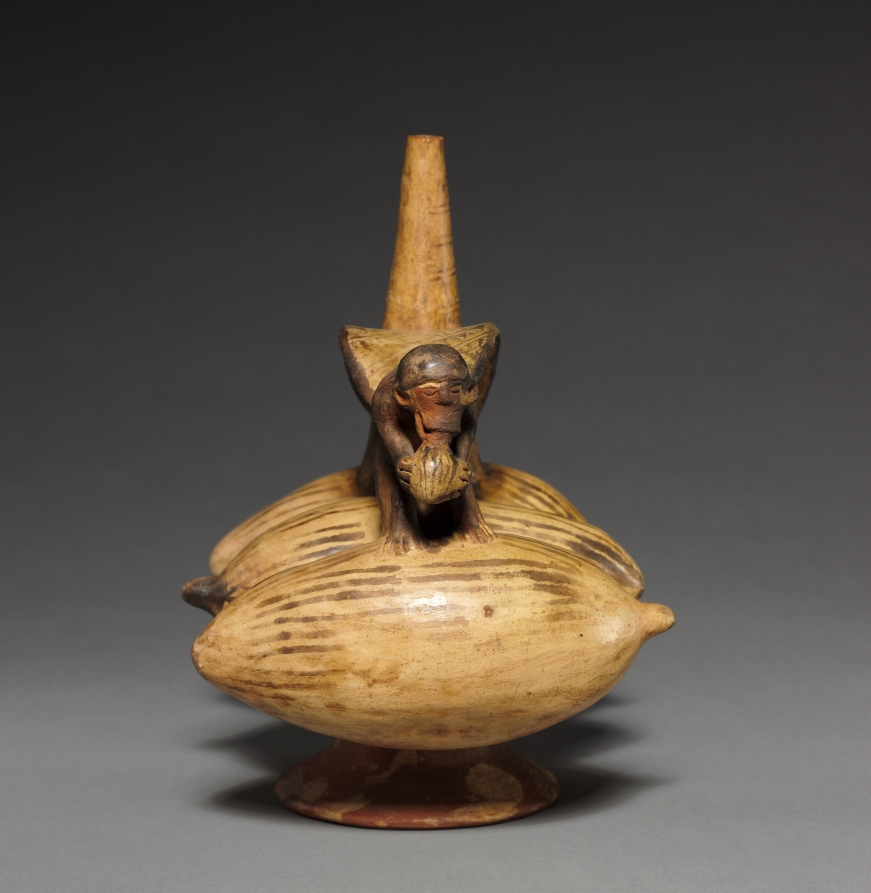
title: Stirrup Jar with Monkey and Three Fruits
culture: Peru, North Coast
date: 1000 or later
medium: red earthenware decorated with cream-colored slip and brown pigment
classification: Ceramic